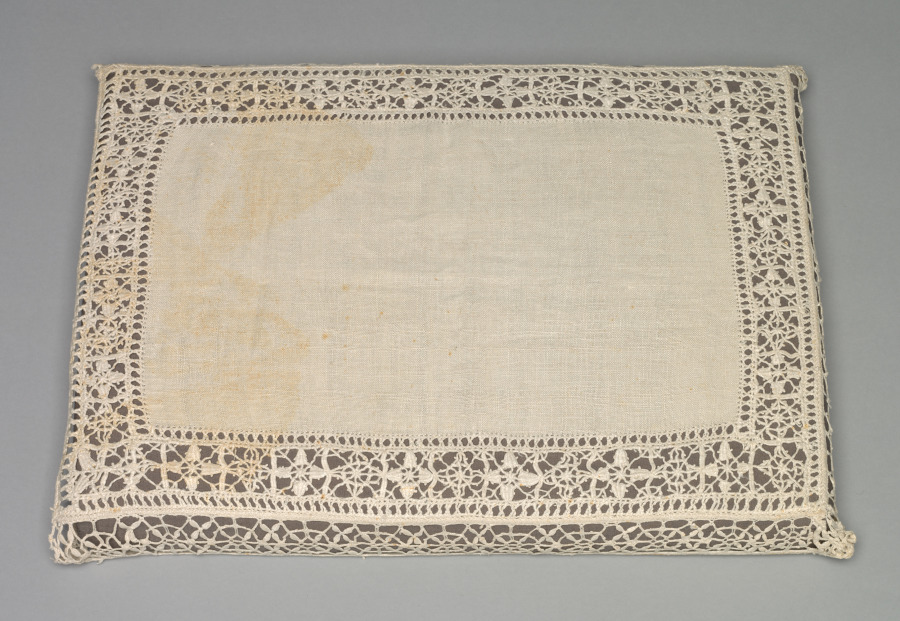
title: Lace Pillow Cover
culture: Italy, Genoa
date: 1600s–1700s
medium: Linen: needle lace (reticella) and bobbin lace edging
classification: Lace